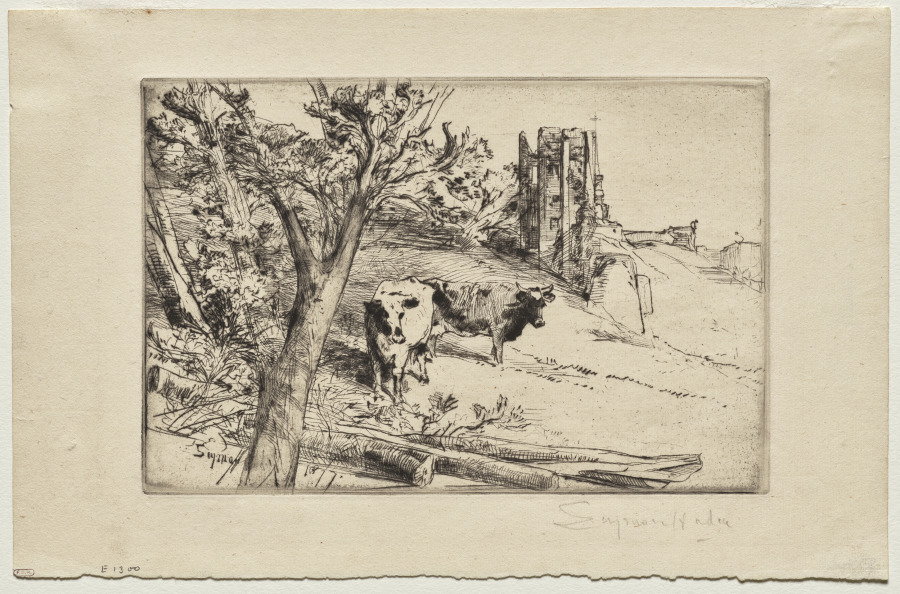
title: The Keep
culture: England, 19th century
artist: Francis Seymour Haden (British, 1818–1910)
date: 1877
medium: drypoint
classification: Print